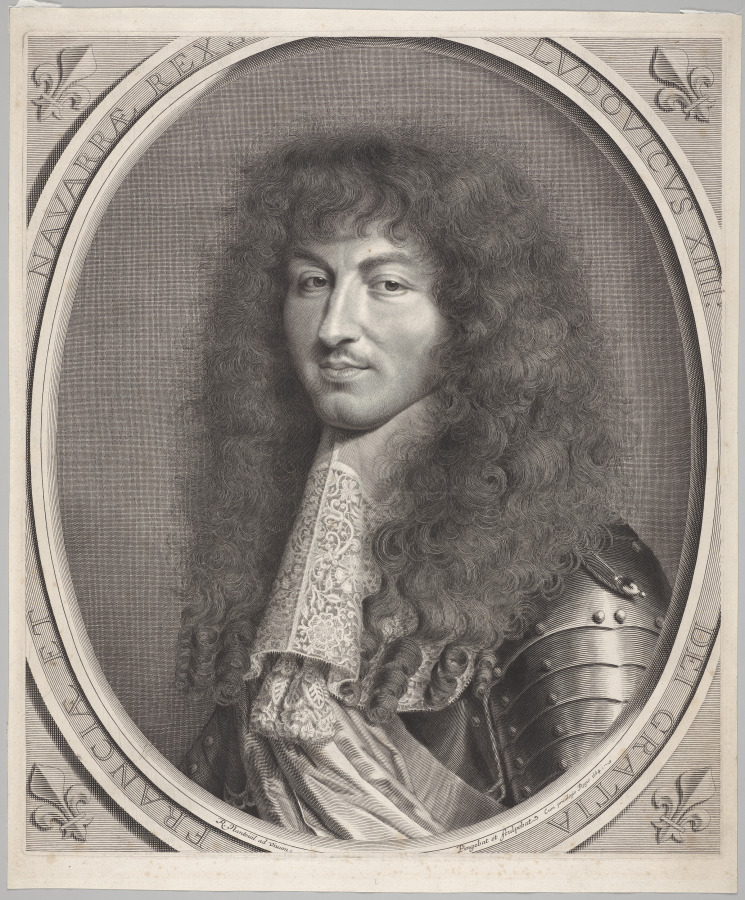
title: Louis XIV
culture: France, 17th century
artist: Robert Nanteuil (French, 1623–1678)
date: 1664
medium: engraving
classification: Print